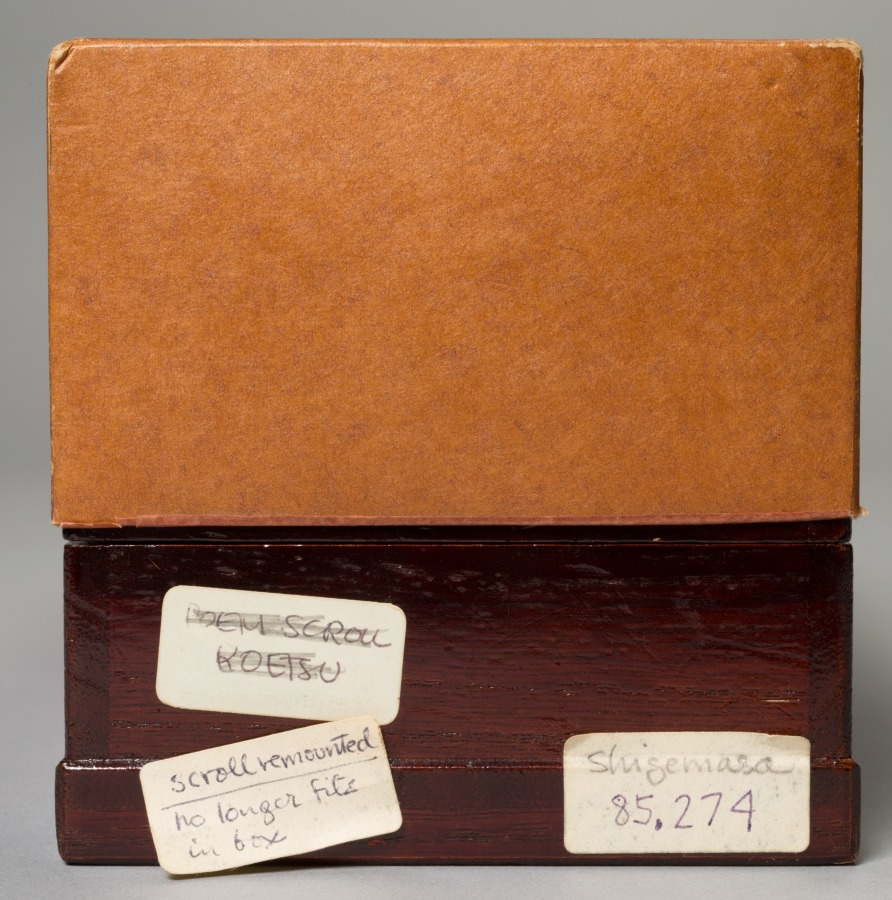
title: Two Beauties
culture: Japan, Edo period (1615–1868)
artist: Kitao Shigemasa (Japanese, 1739–1819)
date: late 1700s–early 1800s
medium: hanging scroll, pillar painting: ink and color on silk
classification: Painting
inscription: Artist's signature and seal, lower right corner. Poem inscribed on upper section of scroll.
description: Shigemasa favored using colors in broad opaque masses, as seen here in the beauties’ robes. He was a painter, printmaker, and poet, specializing in courtesan and actor prints. The format of this hanging scroll or "pillar painting" allows for the work to be hung on a pillar in a Japanese home.